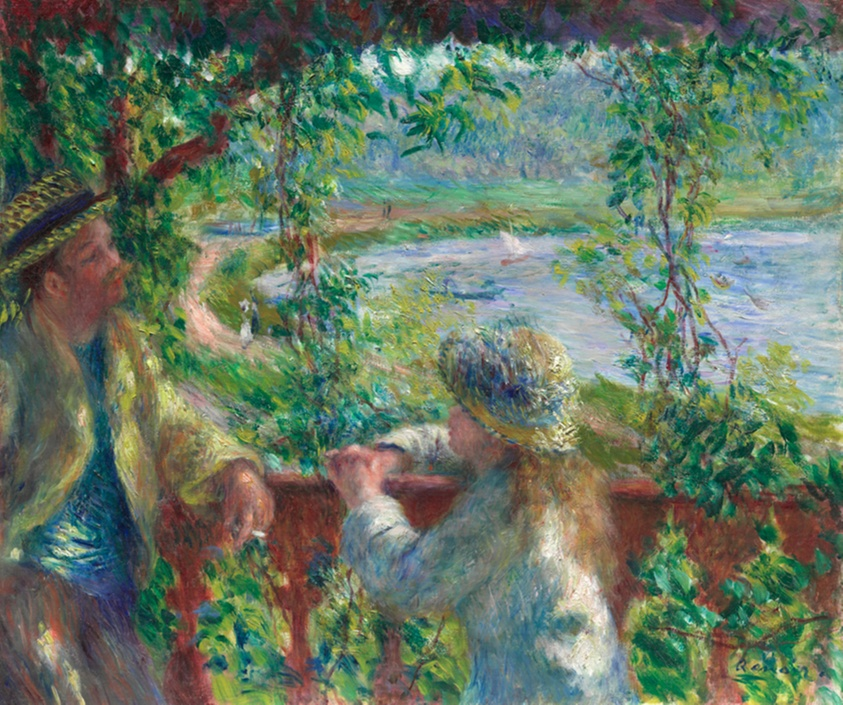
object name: Painting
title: Near the Lake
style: Impressionism, nineteenth century, 19th century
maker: Pierre-Auguste Renoir (French, 1841–1919)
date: 1879–80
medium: Oil on canvas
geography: France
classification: painting; paint; oil on canvas; oil paintings (visual works); french; european painting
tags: landscapes, water, vines, trees, sailing, road, paths, nature, lake, hat, girl, foliage, boats, children, leisure, weather/seasons, men, Century of Progress, world's fairs, Chicago World's Fairs